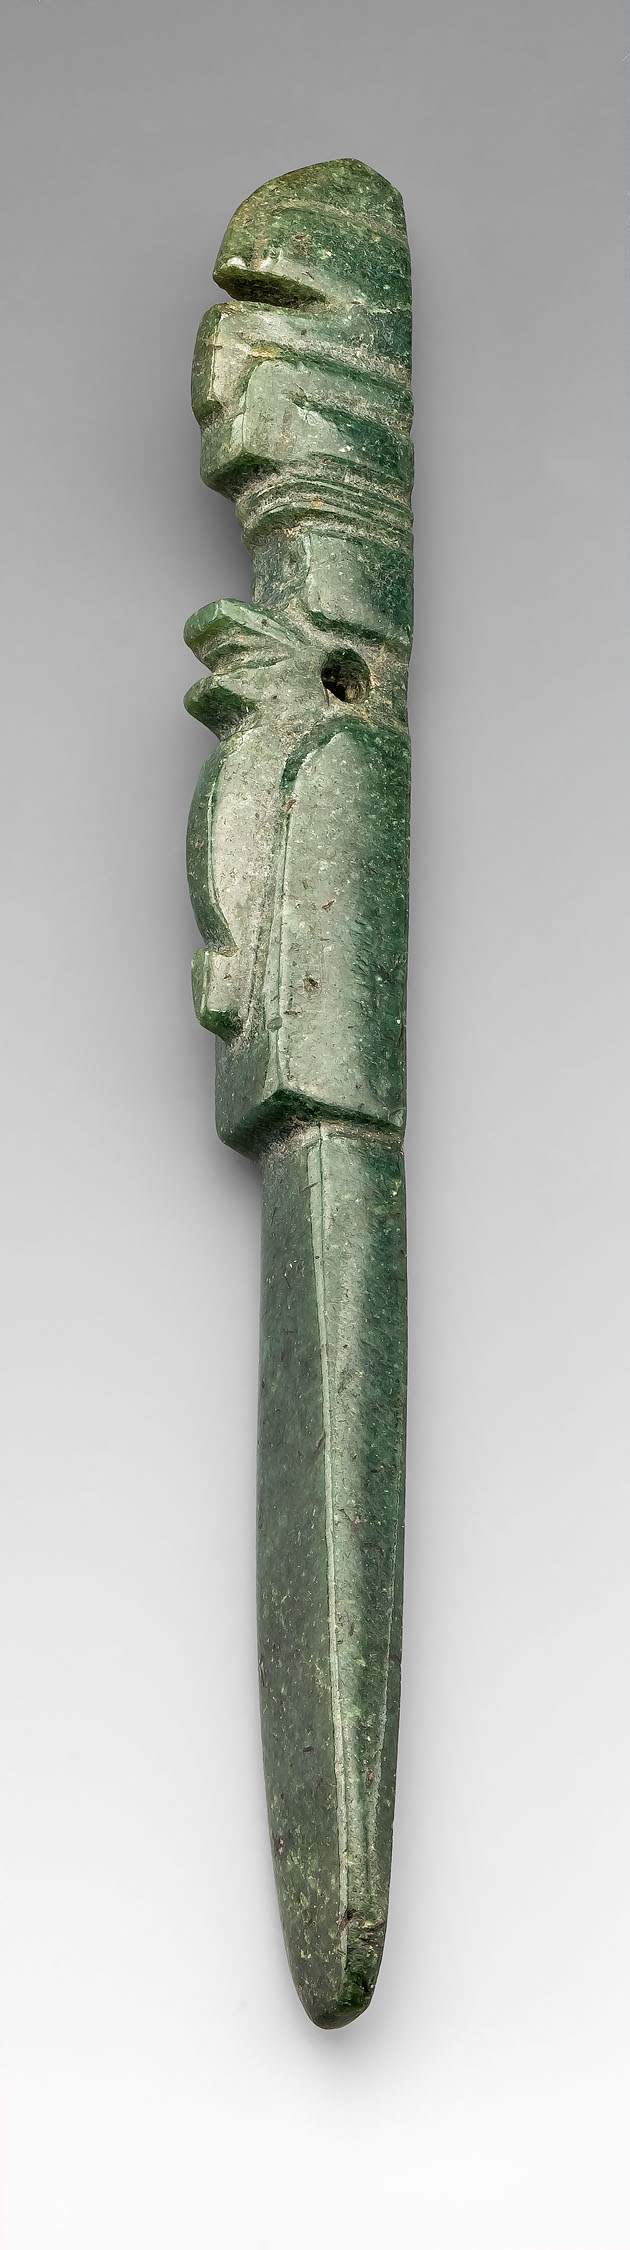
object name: Costume and Accessories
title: Carved Pendant Depicting a Costumed Figure with a Abstract Bird Headdress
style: guapiles, americas, lower central america, Arts of the Americas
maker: Guapiles; Guapiles, Costa Rica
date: 1000–1500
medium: Jadeite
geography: Guápiles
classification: pendant (jewelry); stone; jewelry; art of the americas; costume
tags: abstract figures, birds